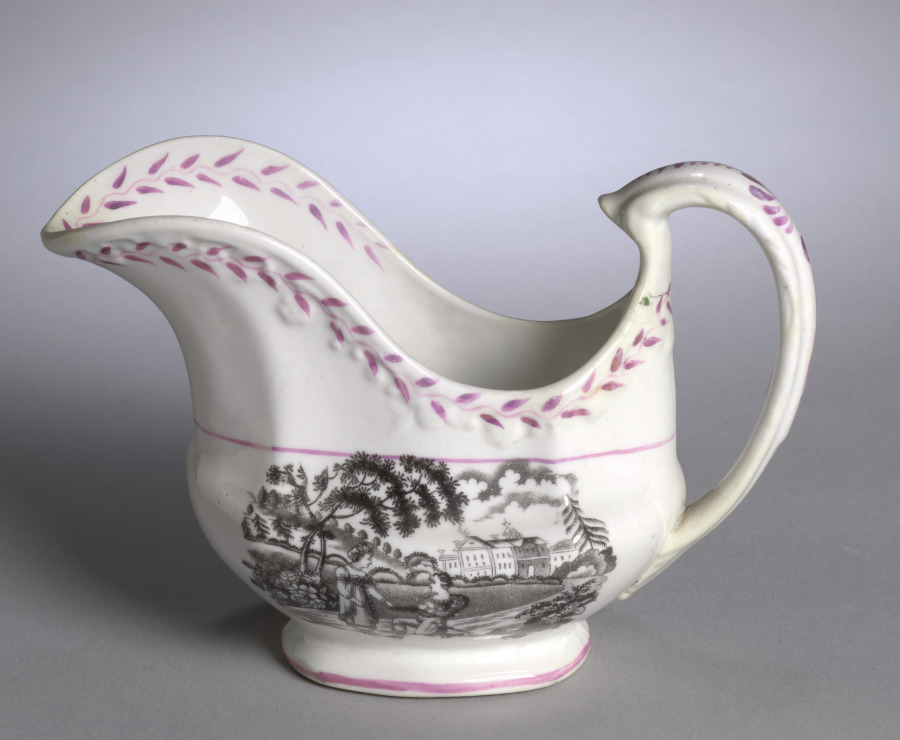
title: Cream Pitcher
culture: England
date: c. 1800–1825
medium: earthenware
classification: Ceramic